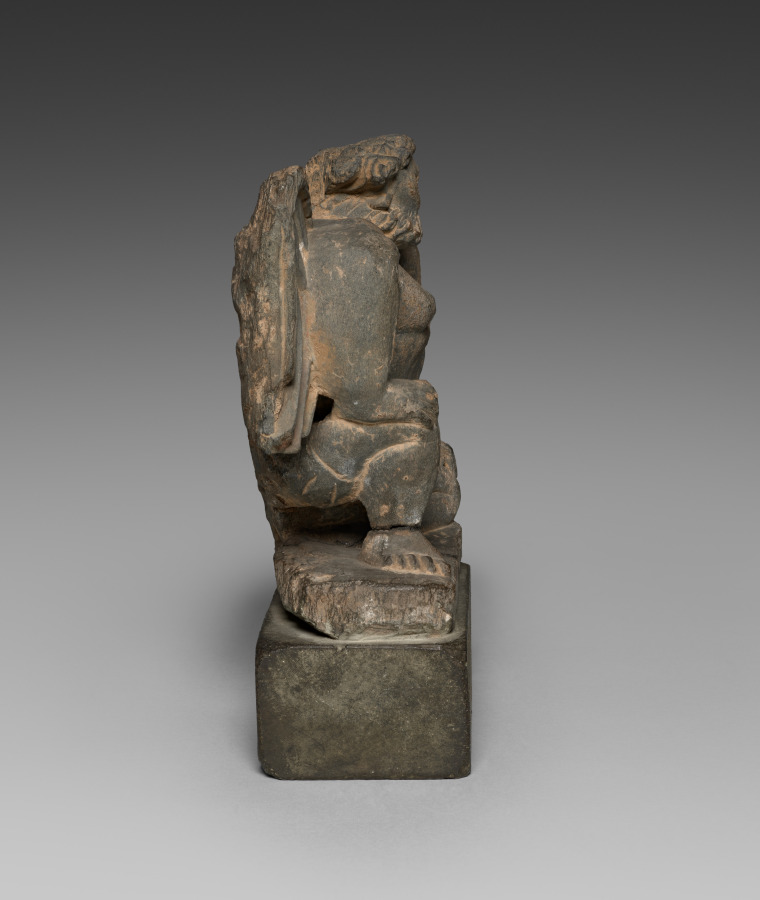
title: Winged Atlas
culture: Pakistan, Gandhara, Kushan period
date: c. 100s–200s CE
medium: gray schist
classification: Sculpture